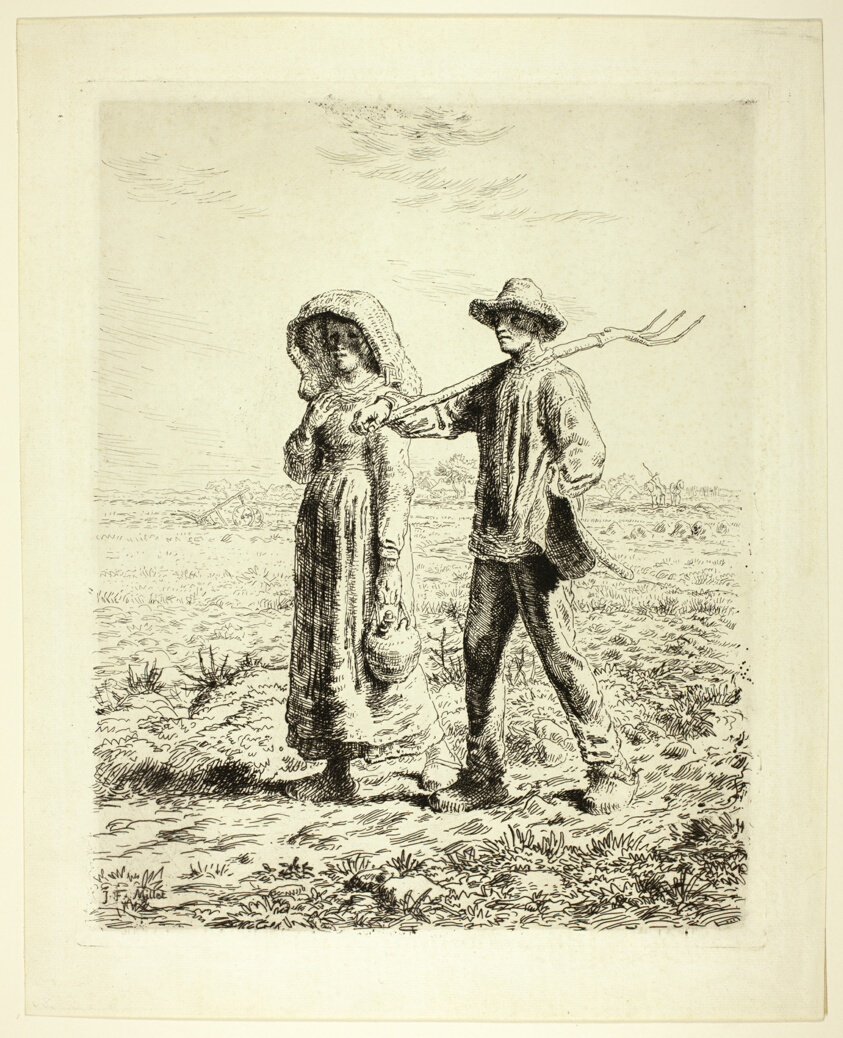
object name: Print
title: Peasants Going to Work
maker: Jean François Millet (French, 1814-1875); printed by Auguste Delâtre (French, 1822-1907)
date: 1863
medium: Etching and drypoint on ivory laid paper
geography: France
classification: etching; print; prints and drawing